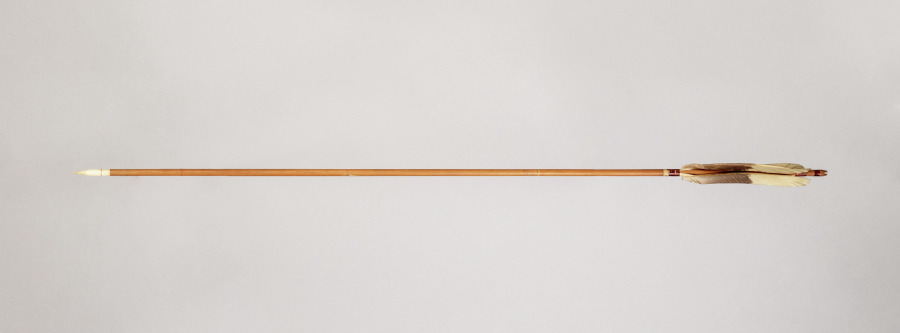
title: Arrow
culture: Japan, Edo period (1615–1868) to Meiji period (1868–1912)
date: 1800s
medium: bamboo shaft tipped with metal point and heeled with feathers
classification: Arms and Armor